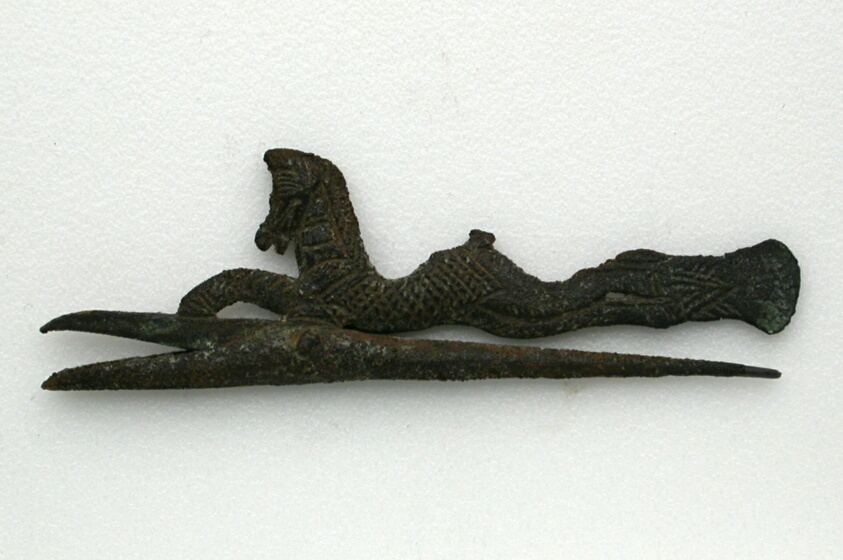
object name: Costume and Accessories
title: Curling Iron or Hair Crimper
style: eighteenth dynasty, new kingdom, egyptian, ancient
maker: Egyptian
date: New Kingdom, Dynasty 18 (about 1550-1295 BCE)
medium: Bronze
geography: Egypt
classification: utensil; bronze; metalwork; ancient art; costume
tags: horses, beauty, rituals